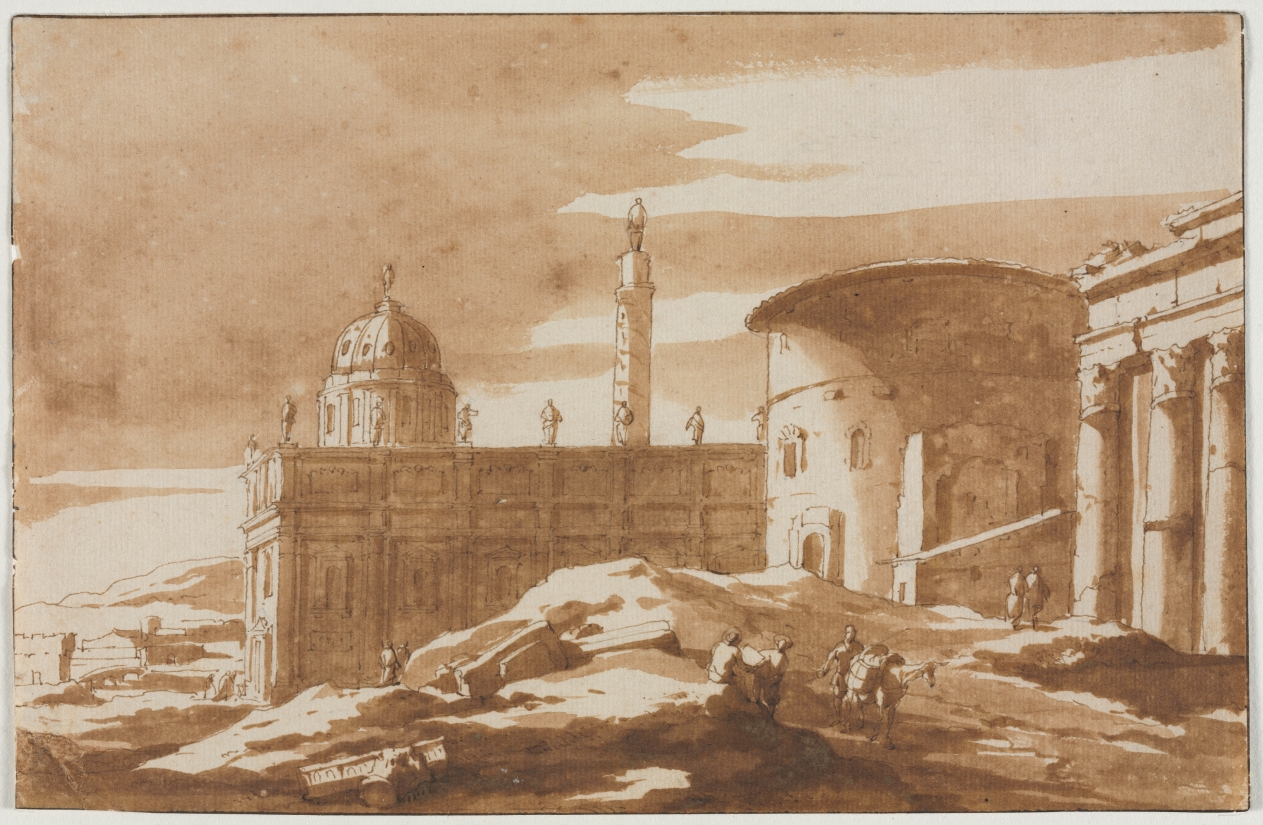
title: View of Ancient Buildings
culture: Netherlands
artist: Jacob van der Ulft (Dutch, 1627–1689)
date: second half 17th century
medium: pen and brown ink and brush and brown wash over traces of graphite; framing lines in brown ink (iron gall)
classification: Drawing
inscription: VERSO, lower left, in graphite: A 2131